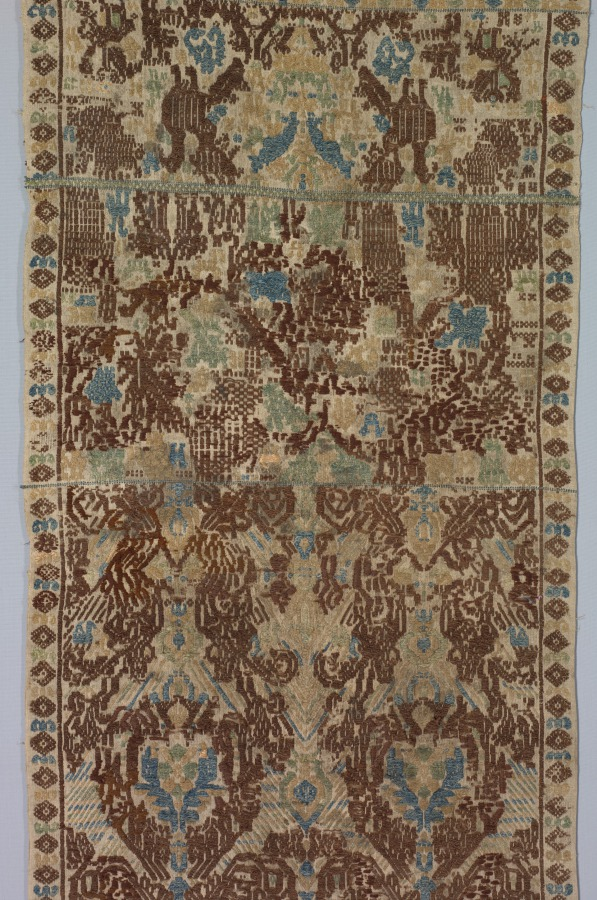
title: Saddle Cloth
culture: Italy, Abruzzi, 17th-18th century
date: 1700s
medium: embroidery; silk on linen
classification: Textile